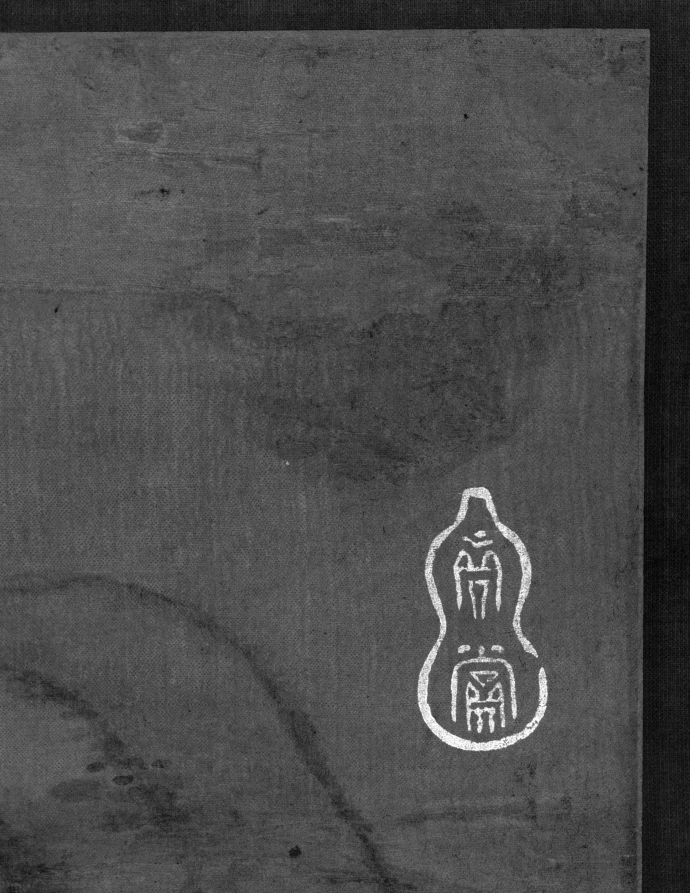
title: Summer Mountains (after Dong Yuan [active c. 937–75])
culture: China, Yuan dynasty (1271-1368)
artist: attributed to Huang Gongwang (Chinese, 1269–1354)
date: 1290–1354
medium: hanging scroll; ink and slight color on silk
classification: Painting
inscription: 【印】一峰道人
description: This monumental landscape is drawn in softly rounded strokes with darker lines frequently applied on top of lighter ones. This technique recalls one of the suggestions included in a collection of the artist's writings known as Secrets of Landscape Painting: The most difficult thing in painting is using the ink. The artist begins by using dilute ink and builds it up to the point where it begins to look right, then uses dense, black ink, applied fairly dry, and washes of deeper-toned ink. This technique distinguishes the fields from the paths, the far from the near. Huang Gongwang may have learned this technique from observing nature through the eyes of an earlier master, Dong Yuan, a painter whose style he shared.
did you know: The wet hills and moist, rich atmosphere evoke the southern Chinese summer, characterized by monsoon rains and lush growth.